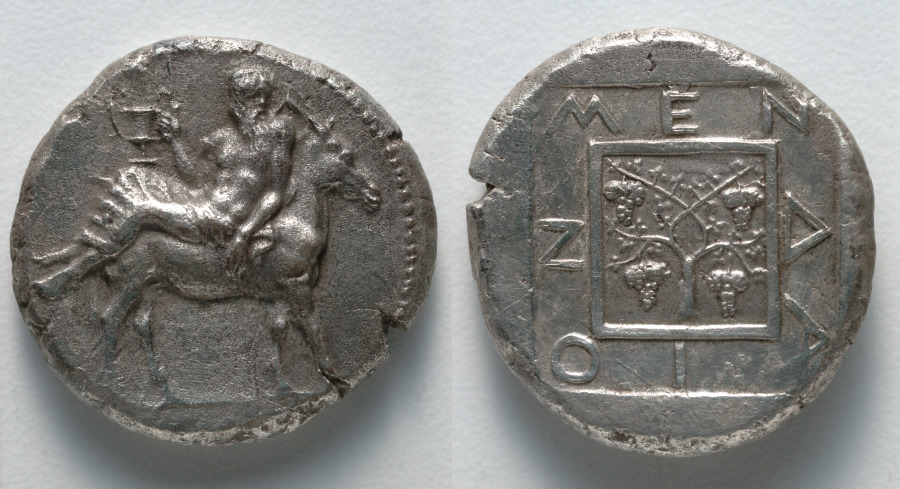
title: Tetradrachm: Dionysos on Donkey (obverse); Grapevine (reverse)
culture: Greek, minted at Mende (Chalkidiki)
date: c. 430 BCE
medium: silver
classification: Coins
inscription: ΜΕΝΔΑΙΟΝ